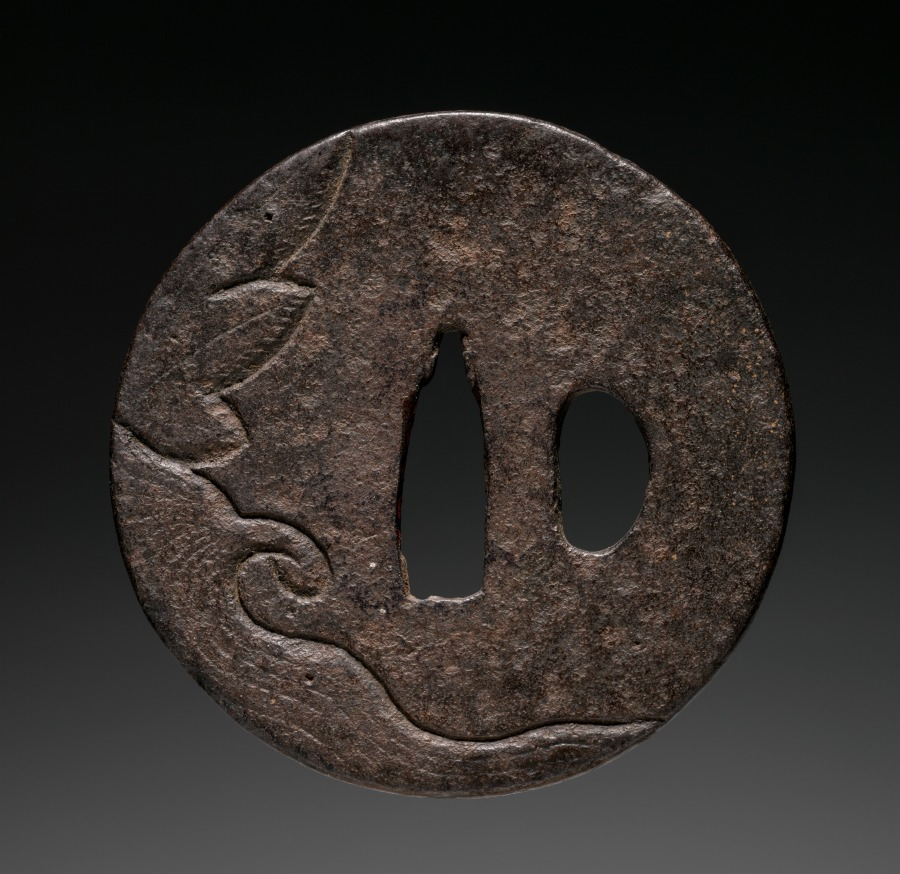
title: Sword Guard (Tsuba) with Maple Leaves on River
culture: Japan, possibly Edo period (1615-1868)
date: c. 1615–1868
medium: iron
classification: Arms and Armor